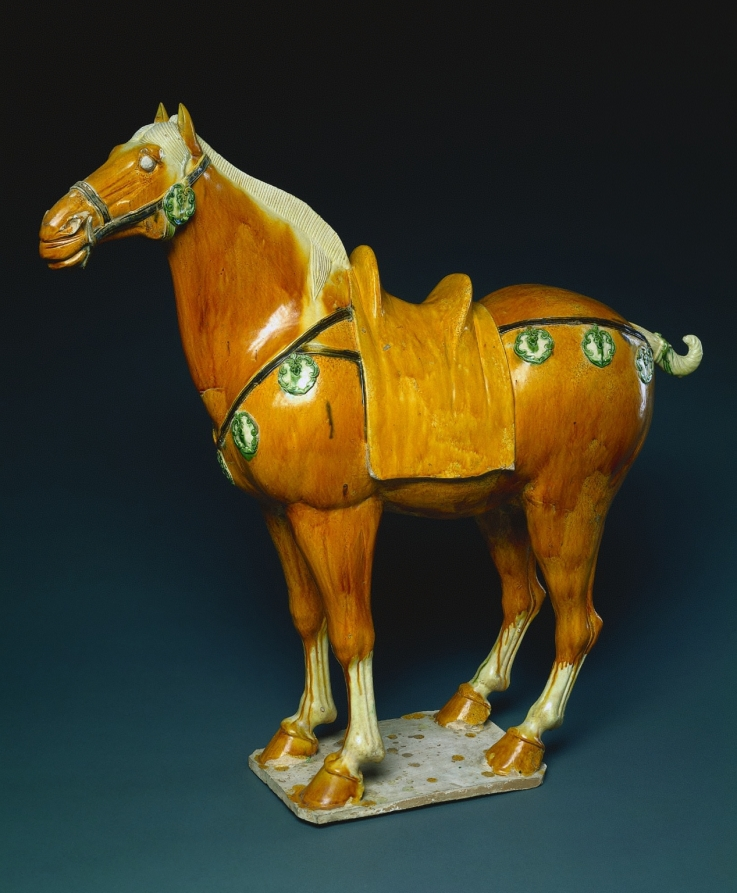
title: Horse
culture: China, probably Henan province, Tang dynasty (618–907)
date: late 600s–800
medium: glazed earthenware, sancai (three-color) ware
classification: Sculpture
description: This ceramic horse was part of a set of figures depicting a procession, all of which was included in the tomb of a person of high rank. In ancient China tombs were equipped with all the items it was thought to be needed in the afterlife—including horses, as an essential mode of transportation.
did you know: Sancai (three-color) glazes in green, amber, and transparent white show the high social status of the tomb’s occupant.